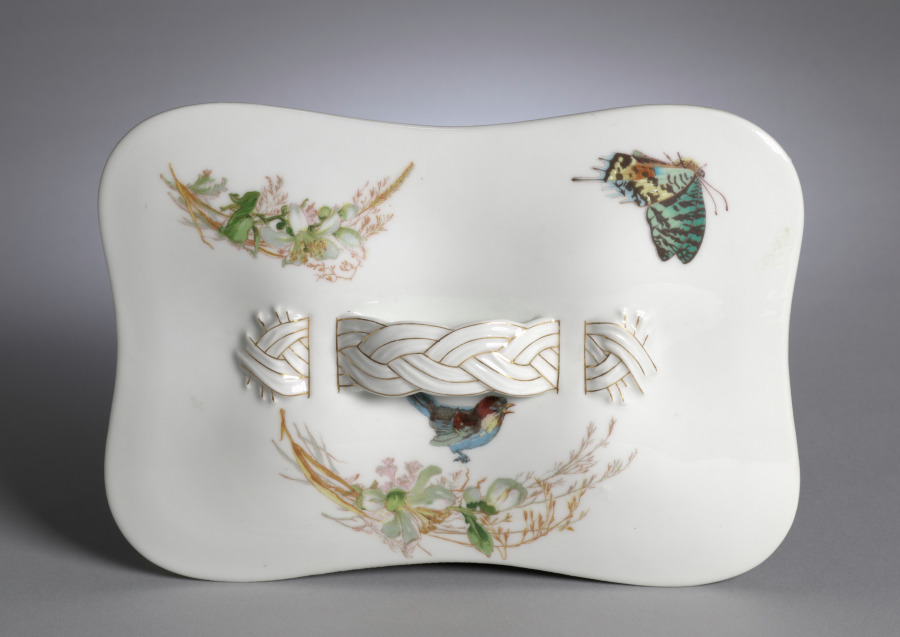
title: Cover for a Vegetable Bowl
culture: France, Limoges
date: c. 1890–1910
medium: porcelain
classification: Ceramic